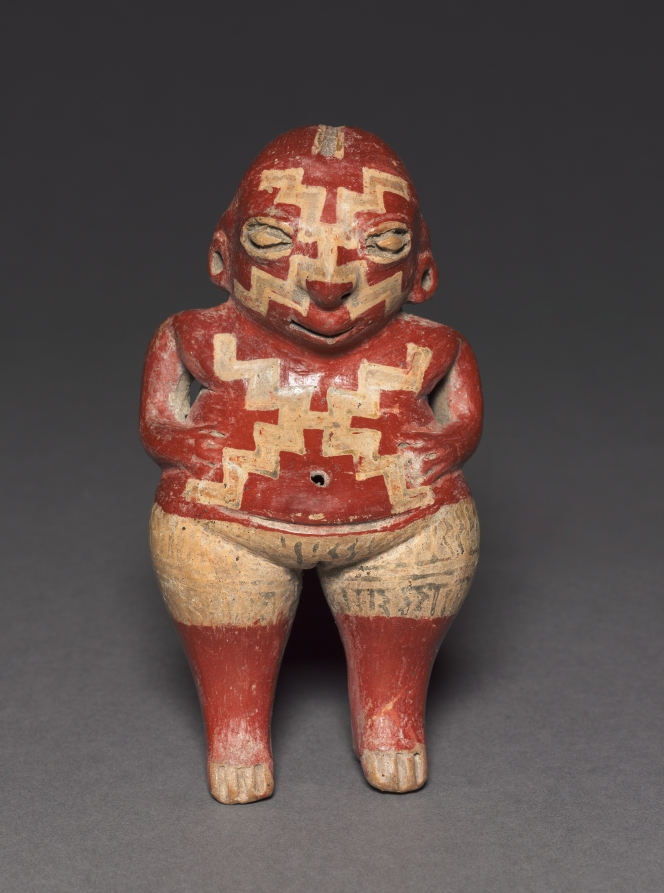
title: Geometrically Patterned Female Figure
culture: Mesoamerica, Guanajuato or Michoacán, Chupícuaro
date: 400–100 BCE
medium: Ceramic, slip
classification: Sculpture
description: Artists of the Chupícuaro culture, based to the north of modern-day Mexico City, may be best known for hollow ceramic figurines like this one. Always female and often apparently pregnant, such figurines commonly are painted with stepped geometric motifs in vibrant, highly burnished slips (creamy mixtures of water and crushed minerals). The meanings of the motifs and the figurines themselves are poorly understood.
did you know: This figure was formed in two halves that were hollowed out and joined at the hips.